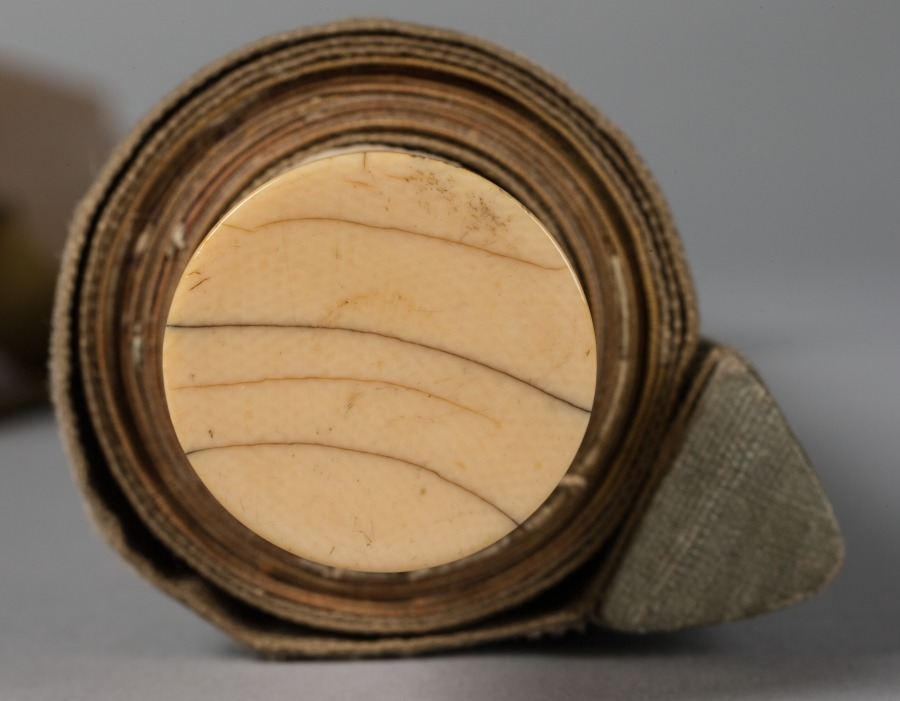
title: Owl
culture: Japan, Edo period (1615–1868)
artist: Tsuda Bensaku (Japanese, active 1620s–40s)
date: 1630s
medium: hanging scroll; ink and slight color on paper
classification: Painting